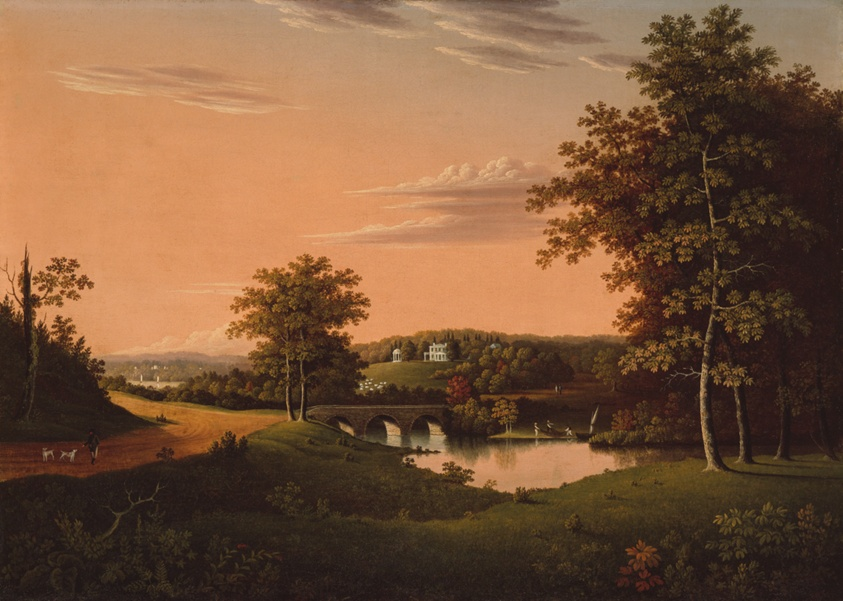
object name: Painting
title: Point Breeze, the Estate of Joseph Napoleon Bonaparte at Bordentown, New Jersey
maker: Attributed to Charles Lawrence; American, active 1813–1837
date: 1817–20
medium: Oil on canvas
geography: Philadelphia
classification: painting; american arts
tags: landscapes, architecture